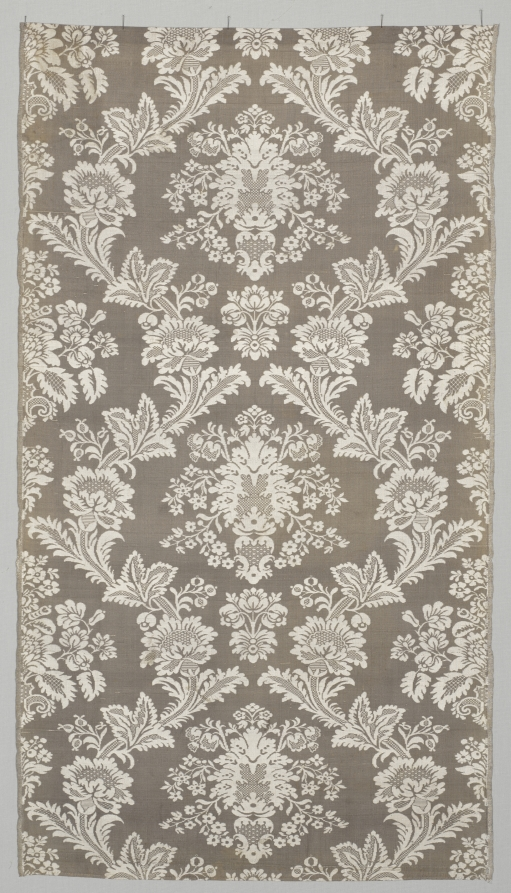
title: Length of Textile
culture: France, mid 18th century, period of Louis XV (1723-1774)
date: mid 1700s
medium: lampas weave, silk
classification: Textile